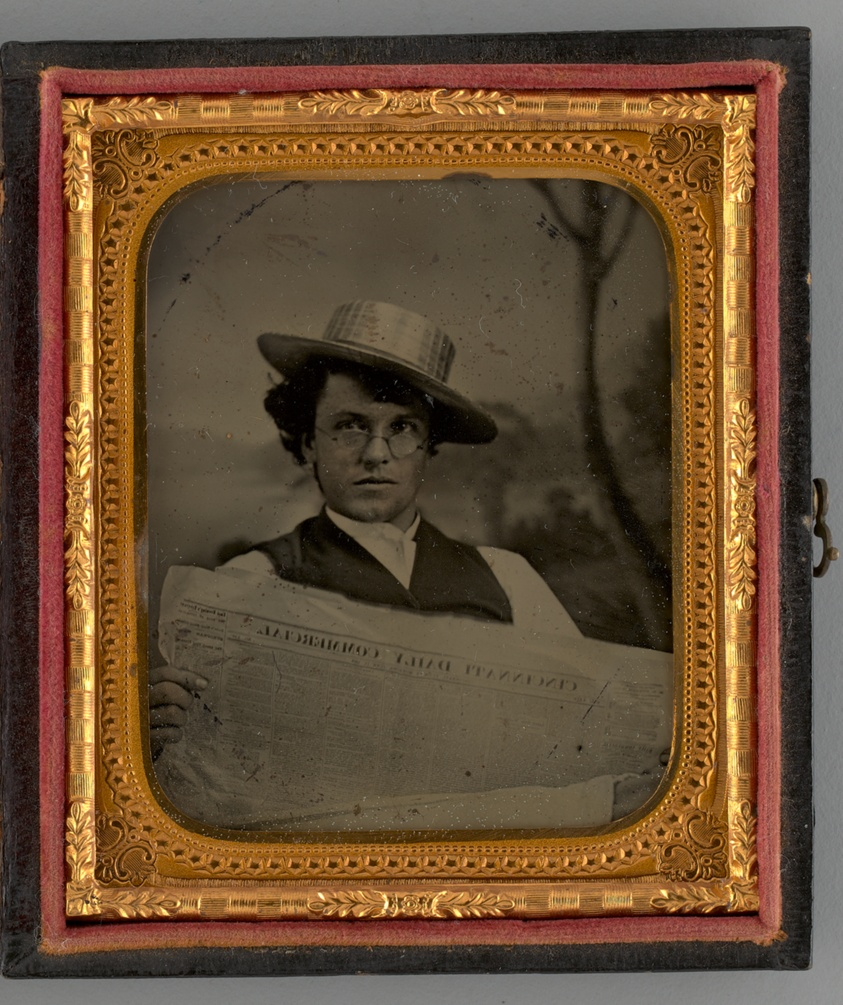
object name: Photograph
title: Untitled (Portrait of a Man Holding a Newspaper and Wearing a Straw Hat)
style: 19th century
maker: Unknown maker; American, 19th century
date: 1868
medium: Tintype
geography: United States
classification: portrait; photograph; photographic process; photography; portrait; tintype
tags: lundberg collection, portraits, portraits: male subject, newspapers, portrait, reading